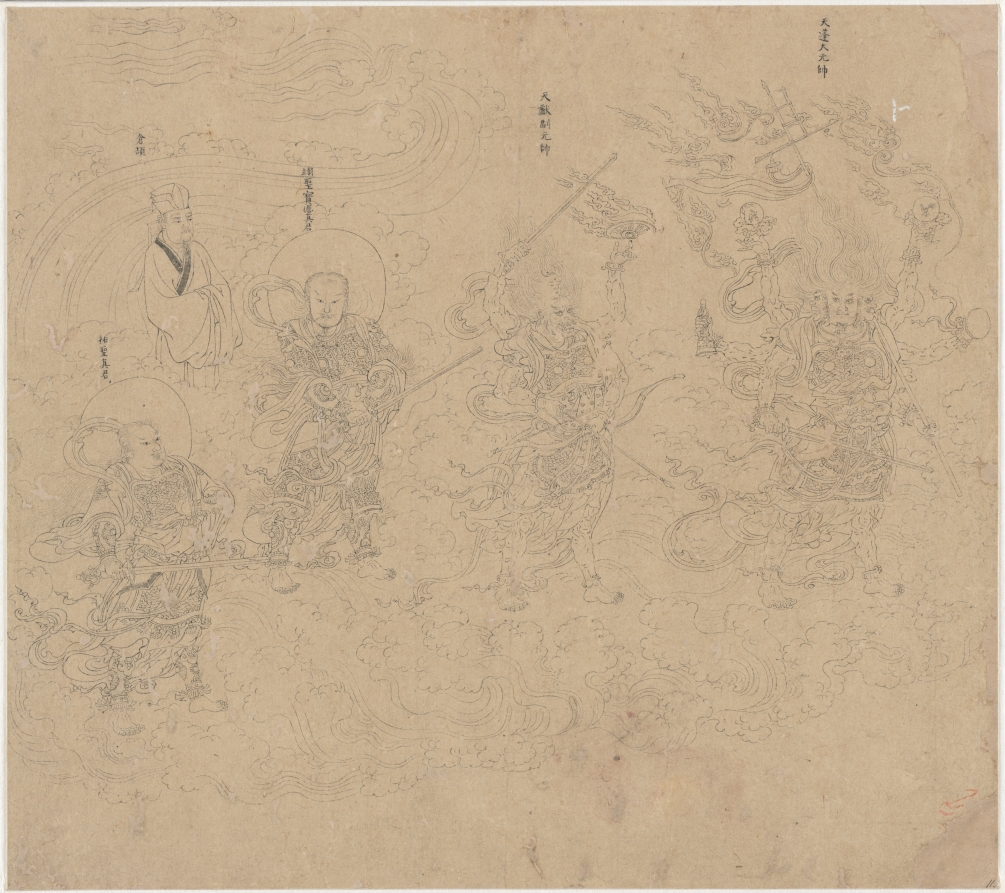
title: Album of Daoist and Buddhist Themes: Procession of Daoist Deities: Leaf 11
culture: China, Southern Song dynasty (1127-1279)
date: 1200s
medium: Album, ink on paper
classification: Painting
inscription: 天蓬大元帥; 天猷副元帥; 翊聖寶德真君; 倉頡; 祐聖真君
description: This album leaf depicts the Four Daoist Saints in martial garb from right to left: Field Marshal Tianpeng 天蓬大元帥, Vice Marshal Tianyou 天猷副元帥, True Lord Yisheng (He Who Cherishes Virtues 翊聖寶德真君), and True Lord Yousheng 祐聖真君. In addition, the painter added the figure of Cang Jie 蒼頡, the legendary inventor of written language. Marshal Tianpeng is represented in the manner of a Buddhist asura, with three faces and six arms.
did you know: Marshal Tianpeng’s top two arms hold the sun with the three-legged crow and the moon with the rabbit pounding the elixir of life.